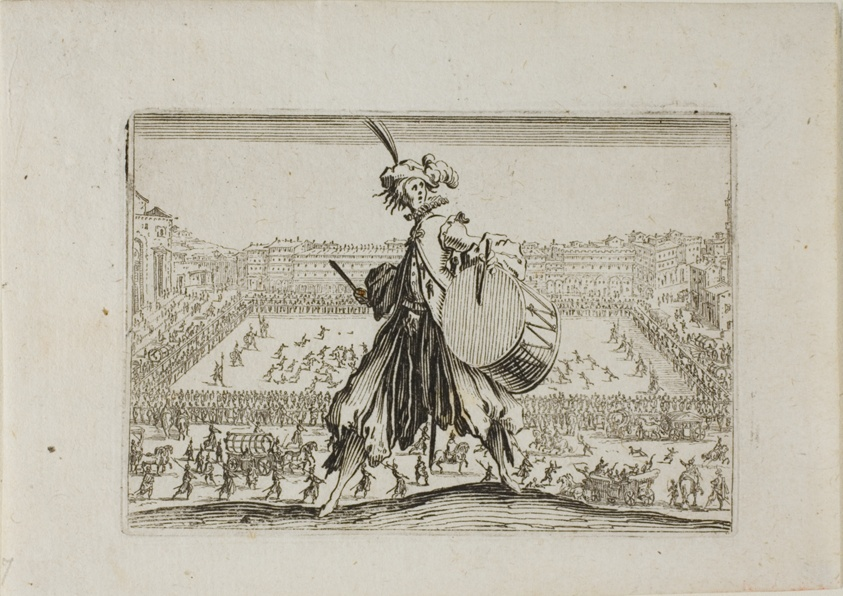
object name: Print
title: View of Piazza S. Croce with Football Game, from The Caprices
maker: Jacques Callot (French, 1592-1635)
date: c. 1622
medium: Etching on ivory laid paper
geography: France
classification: etching; print; prints and drawing